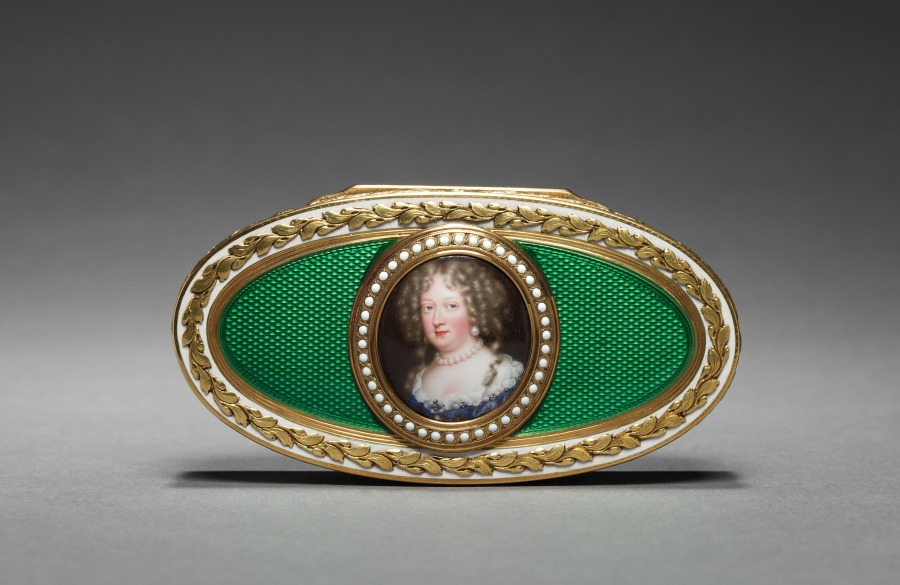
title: Snuff Box (Tabatière) with Portrait of Marie-Thérèse of Austria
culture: France, 18th century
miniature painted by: Jean Petitot (Swiss, 1607–1691)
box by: Charles Le Bastier (French)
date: miniature, c. 1676; box, 1775–76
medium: Gold, enamel, and miniature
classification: Enamel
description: In 18th-century France, ornately enameled boxes that held snuff—powdered tobacco—became a popular accessory in the French court. This box is decorated with a miniature portrait of Marie-Thérèse of Austria, the queen consort of French King Louis XIV. Their union was largely political. A year into their marriage Louis XIV took an official mistress, Madame Pompadour.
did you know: This box resulted from the combined efforts of the popular portrait painter who served the court of French King Louis XIV, Jean Petitot, and master goldsmith Charles Le Bastier.